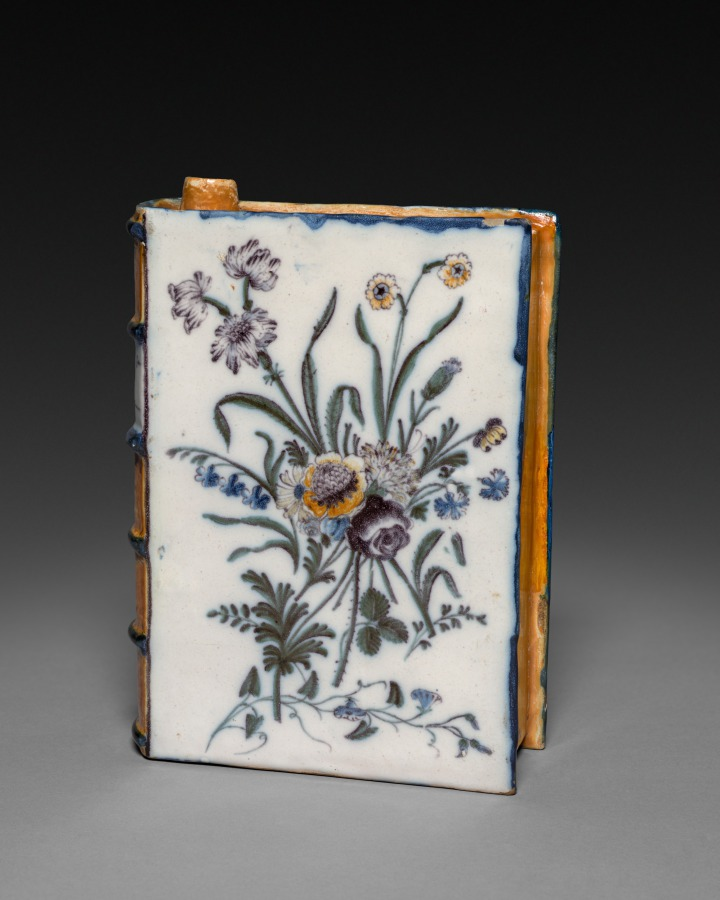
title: Hand Warmer or Flask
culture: France, Marseilles(?), mid 18th century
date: mid 1700s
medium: faience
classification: Ceramic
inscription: inscribed on spine: "LETTRE.HiS-/ . /TORiQVES . -- / TOM . I."